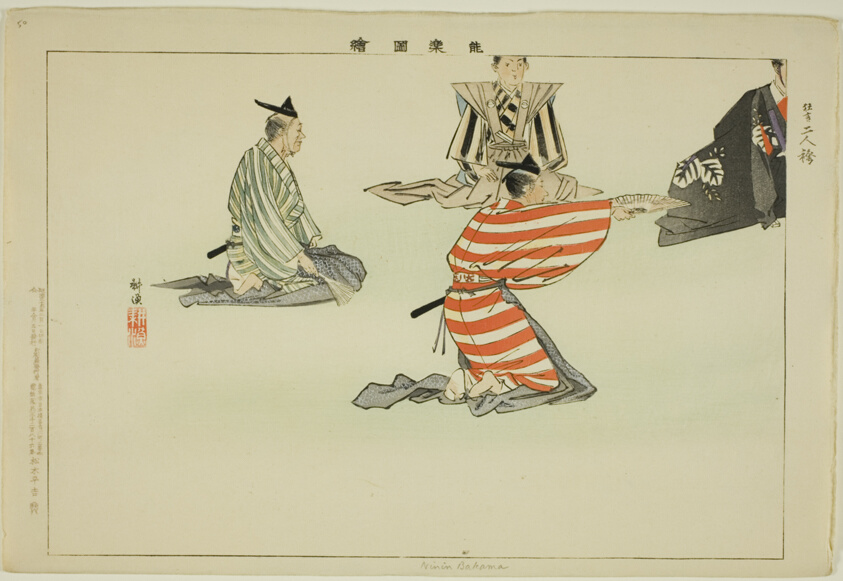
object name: Print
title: Ninin Bakama, from the series "Pictures of No Performances (Nogaku Zue)"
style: Japanese (culture or style)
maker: Tsukioka Kogyo; Japanese, 1869-1927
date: 1898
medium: Color woodblock print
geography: Japan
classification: woodblock print; print; asian art